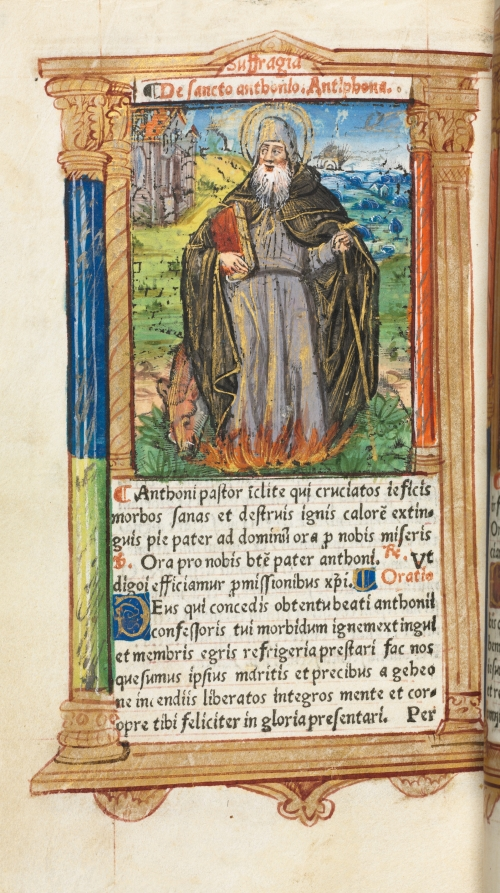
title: Printed Book of Hours (Use of Rome): fol. 104v, St. Anthony Abbot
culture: France, Paris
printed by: Guillaume Le Rouge (French, Paris, active 1493–1517)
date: 1510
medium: 112 Printed folios on parchment, bound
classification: Bound Volume